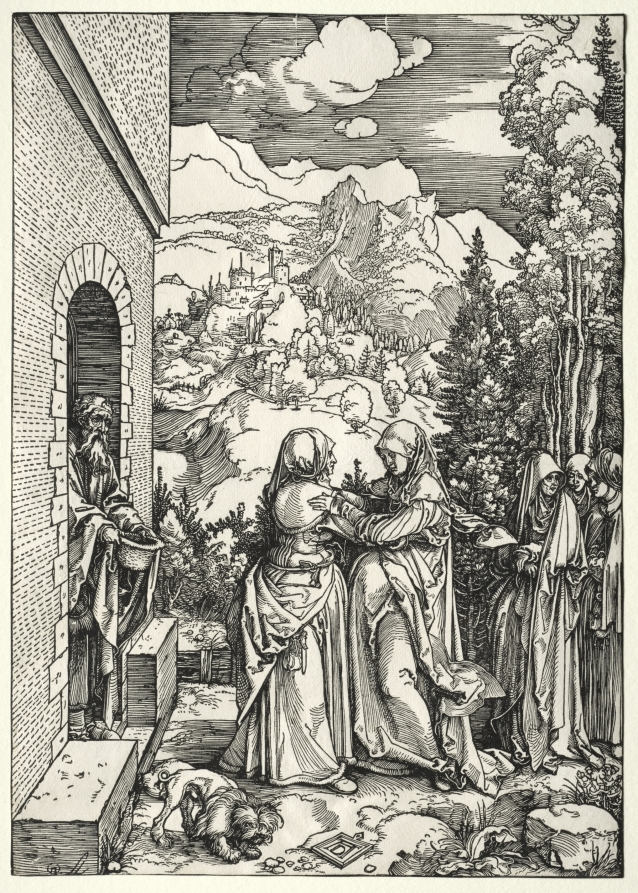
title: The Visitation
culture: Germany, early 16th Century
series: The Life of the Virgin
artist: Albrecht Dürer (German, 1471–1528)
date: c. 1504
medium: woodcut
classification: Print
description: These eight woodcuts (1959.99.8-15) progress from Gabriel’s announcement to Mary that she would bear the Son of God, to the events of her early motherhood and beyond. This included the joy of sharing her pregnancy with her cousin Elizabeth, Jesus’s birth, and the subsequent arrival of the magi. After Jesus’s circumcision and presentation at the temple the Holy Family fled to Egypt to avoid Herod and stayed there for several years. The seemingly out of place last scene shows a glimpse of their daily life in Egypt as Joseph continues his carpentry and Mary spins wool. The Holy Family is surrounded by angels and helpful putti and are blessed by God the Father and the Holy Spirit in the form of a dove overhead.